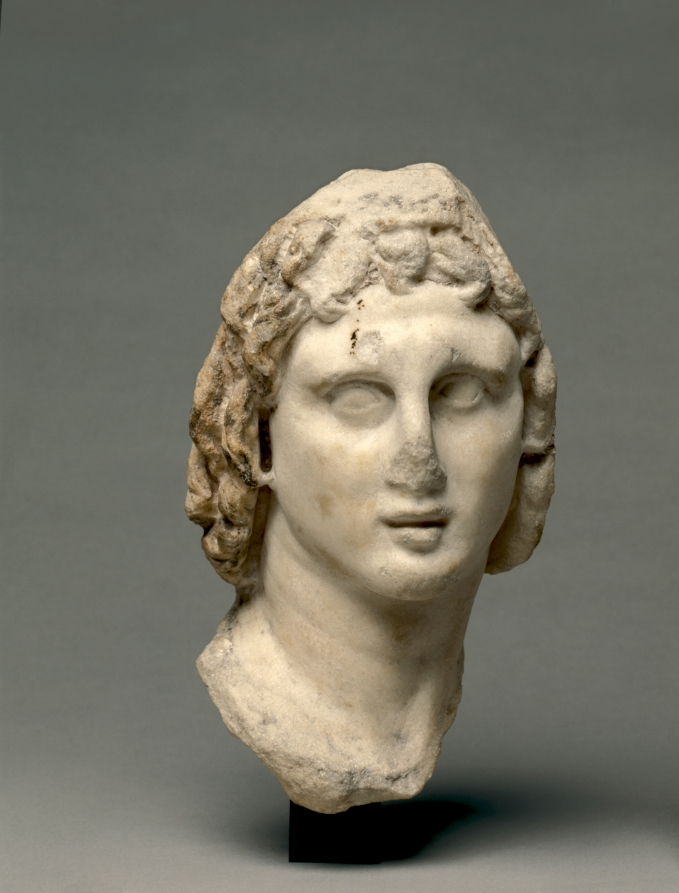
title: Head of Alexander the Great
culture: Greece, Alexandria, Hellenistic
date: 300–200 BCE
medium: marble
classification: Sculpture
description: Slightly smaller than life-size, this head of Alexander the Great features a slight turn, tilt, and upward gaze said to have characterized the young conqueror's posture in life. After his death, Alexander was worshiped as a god; posthumous portraits like this one, likely carved in Ptolemaic Egypt, portray him with long hair and youthful, idealized features.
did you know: Portraits of Alexander the Great share his characteristic anastole hairstyle, parted off-center and swept back from the forehead.